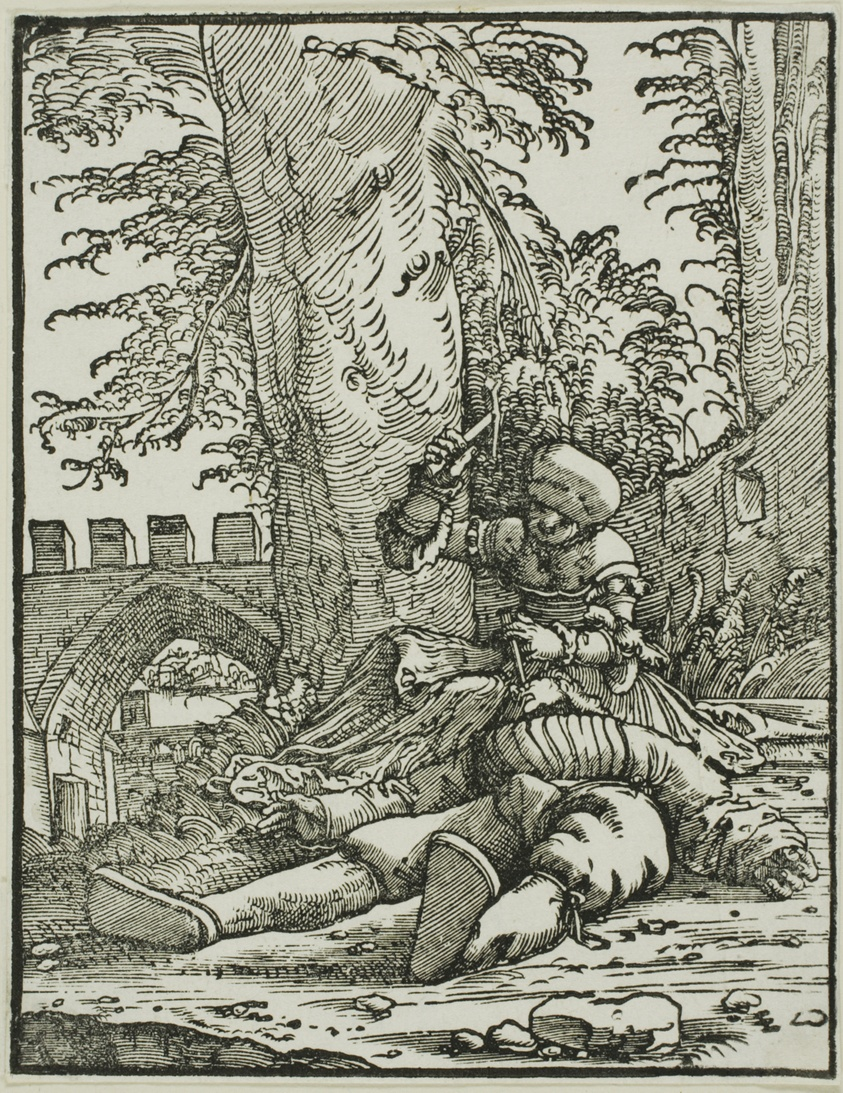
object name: Print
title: Jael and Sisera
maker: Albrecht Altdorfer (German, c. 1480-1538)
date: 1520/25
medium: Woodcut in black on ivory laid paper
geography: Germany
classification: wood engraving; print; prints and drawing